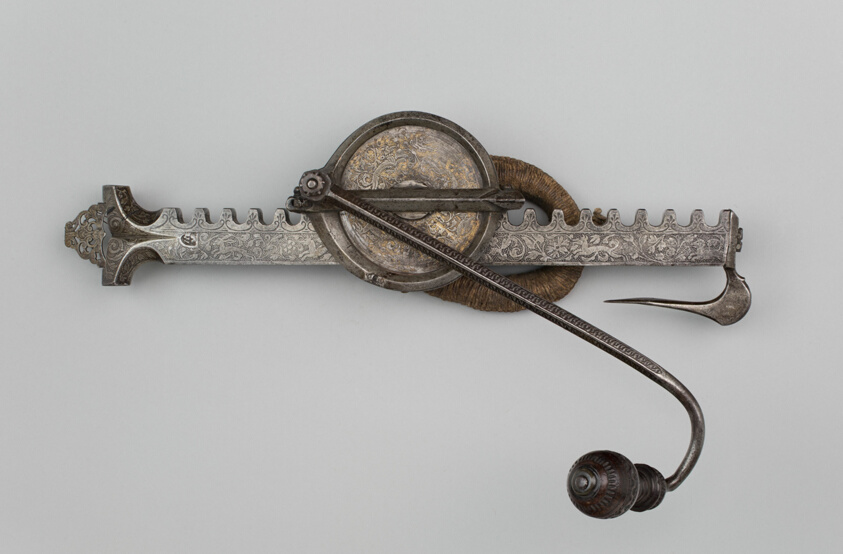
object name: Arms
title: Cranequin ( Winder ) for a Crossbow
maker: South German; possibly Nuremberg; Master H W over W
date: 1570/1600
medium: Iron with gilding, wood, and cord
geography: Nuremberg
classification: crossbow; arms; arms and armor